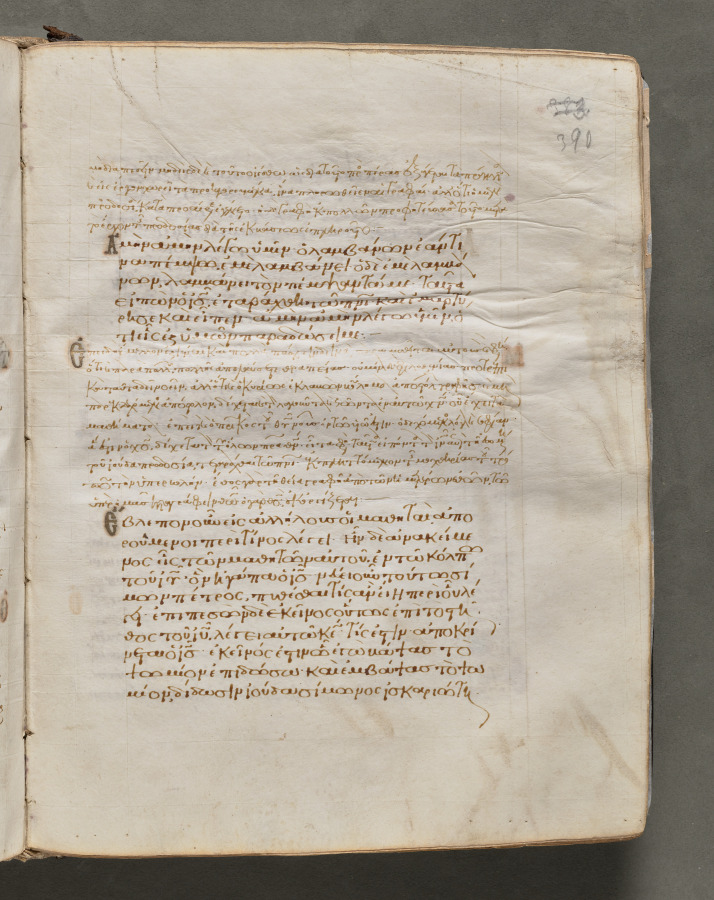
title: Text, folio 390 (recto), from a Gospel Book with Commentaries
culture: Byzantium, Constantinople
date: c. 1000–1100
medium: ink, tempera, and gold on vellum; leather binding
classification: Bound Volume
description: Each of the four gospels in this book opens on a page with brilliantly illuminated borders depicting the author of the text as well as birds—principally peacocks, symbols of the immortality of the soul—and fountains, representing the fountain of life and the salvation of the soul. This volume consists of 428 leaves with texts in Greek. Its level of sophistication suggests that it was probably written and decorated in a monastery in Constantinople.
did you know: Gospel books were carried in procession through Byzantine churches.